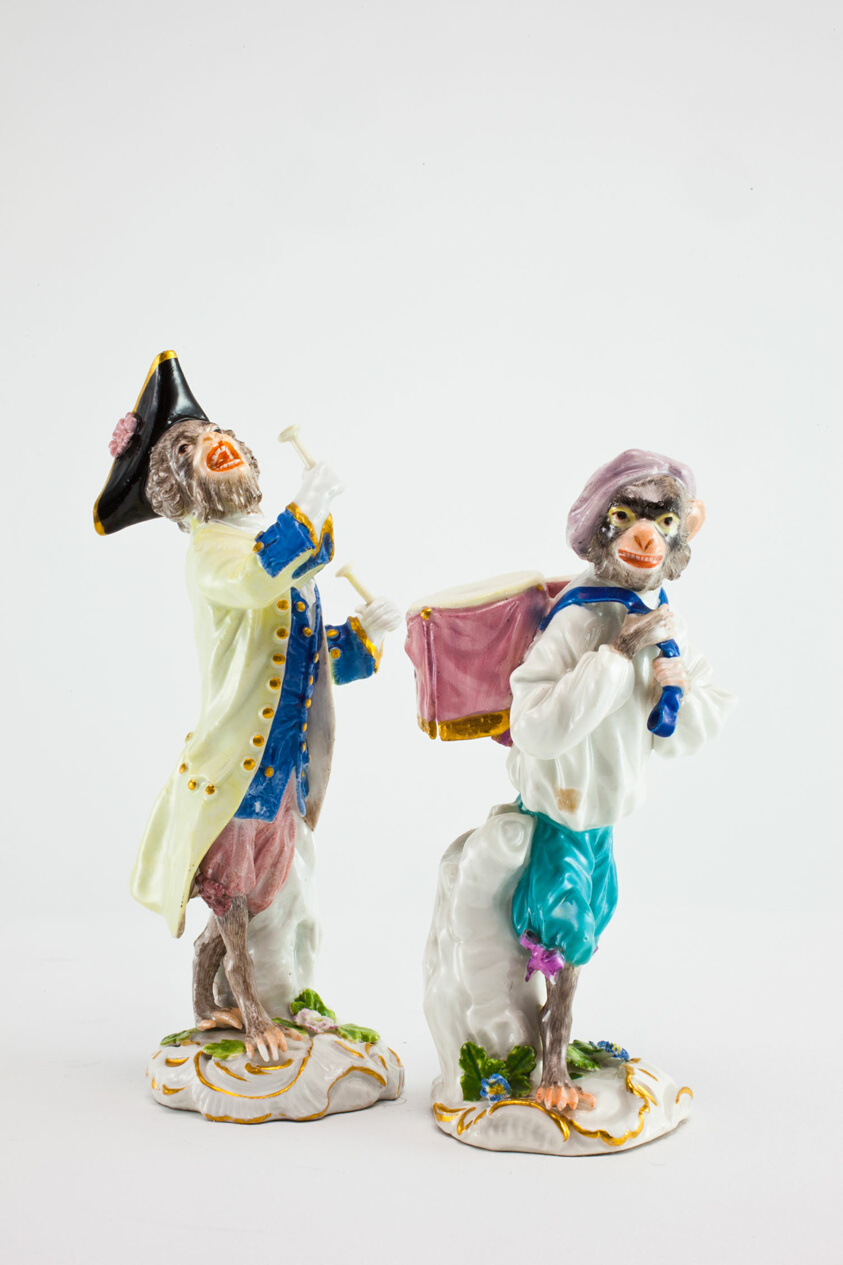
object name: Ceramics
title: Drum Bearer for the Monkey Band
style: Rococo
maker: Meissen Porcelain Manufactory; German, founded 1710; After a model of Kändler or Reinicke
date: c. 1765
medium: Hard-paste porcelain, polychrome enamels, and gilding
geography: Meissen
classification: sculpture; ceramics; porcelain; european decorative arts